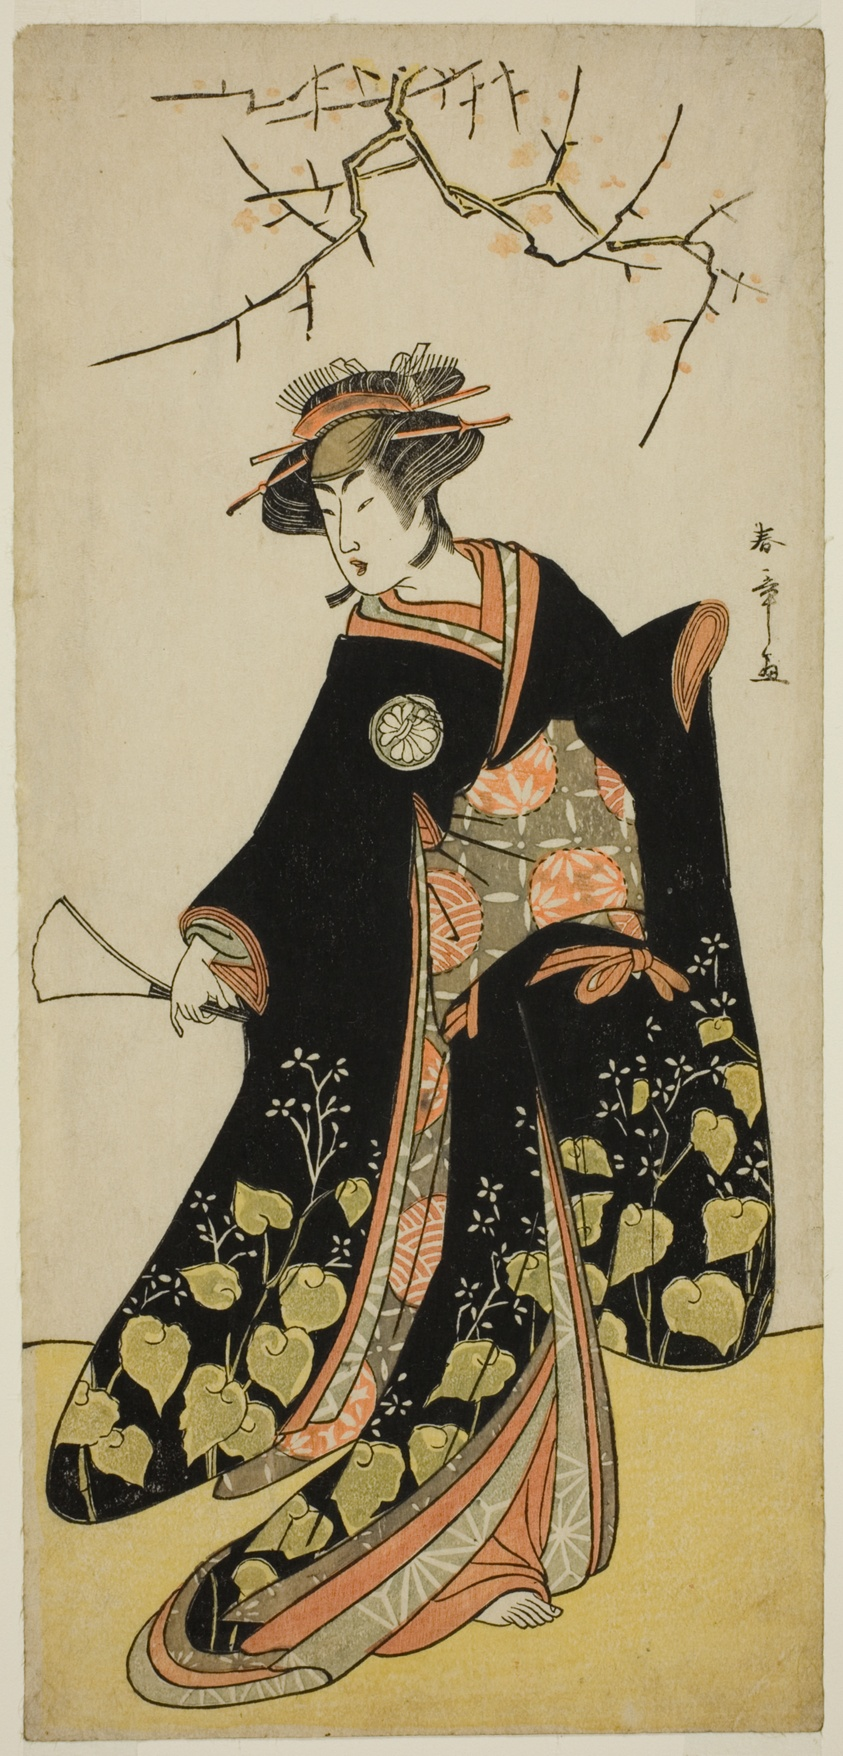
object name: Print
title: The Actor Segawa Kikunojo III as the Spirit of Joro-gumo (Harlot Spider) Disguised as the Maiko Tsumagiku (?), in the Play Shitenno Tonoi no Kisewata (?), Performed at the Nakamura Theater (?) in the Eleventh Month, 1781 (?)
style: Japanese (culture or style)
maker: Katsukawa Shunsho 勝川 春章; Japanese, 1726-1792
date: c. 1781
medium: Color woodblock print; hosoban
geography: Japan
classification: woodblock print; print; asian art